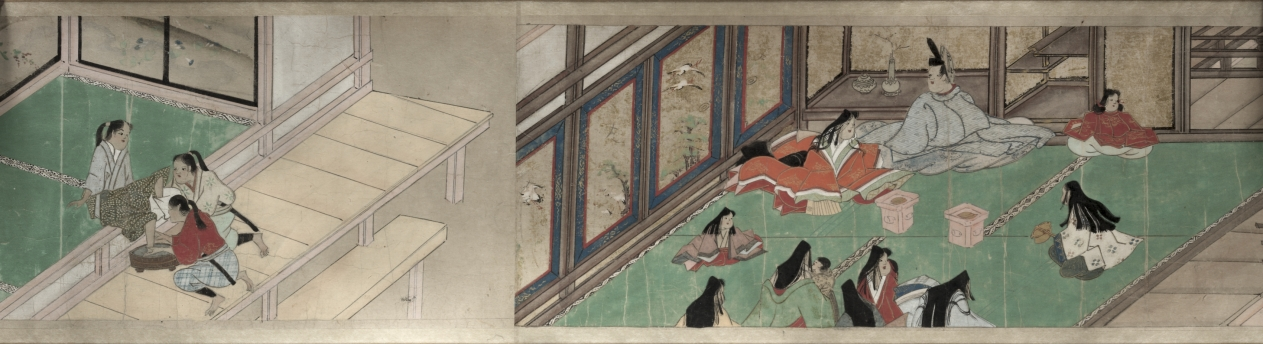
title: The Saltmaker's Story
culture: Japan, Edo period (1615–1868)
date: early 1600s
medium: One of a pair of handscrolls; ink, color, and gold on paper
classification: Painting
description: Once read and copied by girls at New Year’s celebrations and included in dowries, The Saltmaker’s Story is a rags-to-riches tale in which daughters are gifts from the gods. Despite his simple outlook, the main character progresses from humble roots as an associate at Kashima Shrine to the elite status of grandfather of the emperor through the intervention of the Kashima deity. The Saltmaker’s Story is traditionally presented in a set of three scrolls, but the text of this set has been removed by a previous owner, who remounted the illustrations as a pair. The paintings of this one take us from right to left through the second half of the tale.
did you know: This handscroll originally had texts before its paintings, but the texts were removed.